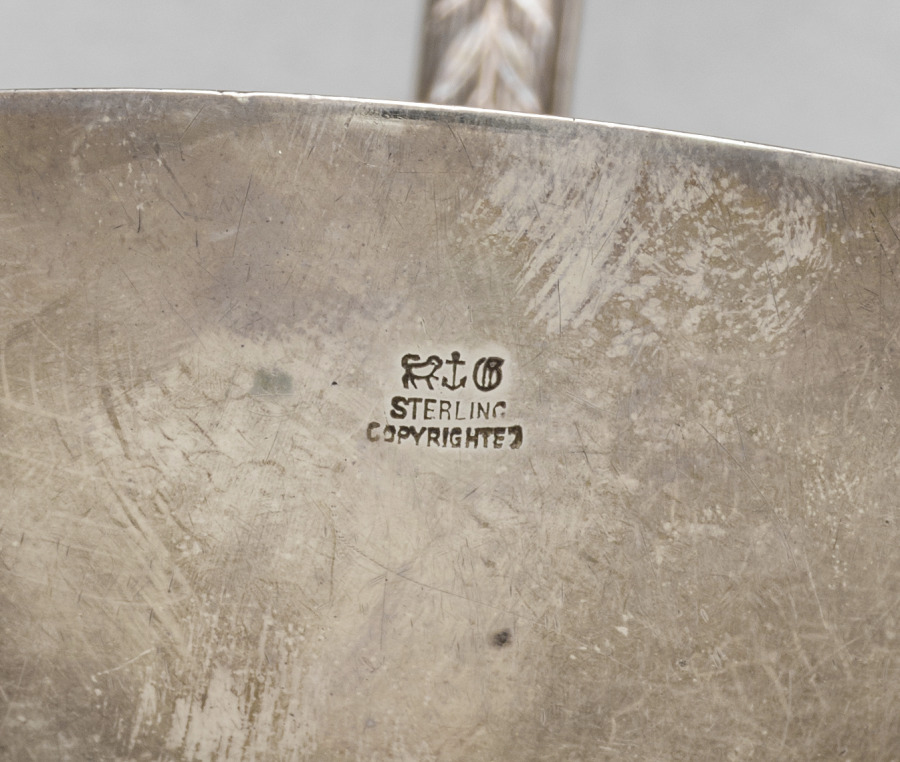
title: Ladle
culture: America, New York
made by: Gorham Manufacturing Company (America, est. 1831)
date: c. 1905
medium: silver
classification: Silver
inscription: engraved "AFR" on back of handle end.